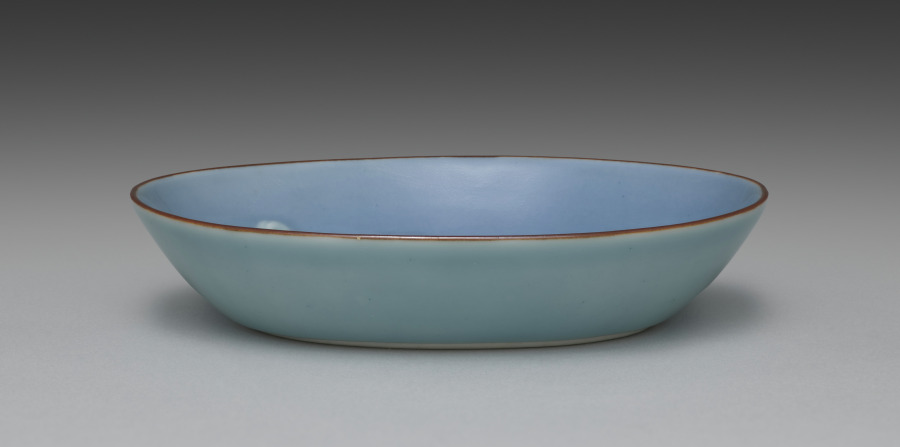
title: Dish from Dishes with Shells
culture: Japan, Taishō period (1912–26)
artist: Seifū Yohei IV (Japanese, 1872–1951)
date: 1914–46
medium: One from a set of five dishes; porcelain with blue glaze, iron oxide, and molded design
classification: Ceramic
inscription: 清風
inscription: 清風造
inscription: 清風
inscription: 成山清風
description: Yohei IV chose an aquatic theme for this set of five mukōzuke, side dishes. He added an iron oxide rim and used a concentrated blue glaze on both the interior and exterior. The glaze, named on the box lid, is his father’s “evening moon” (tsukiyoi) color. The conch in relief takes up the entire bottom of the dish. Up the sides are two snails on one end and on the other a scallop. This results in a boldly graphic, less realistic effect.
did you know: This set of dishes, mukōzuke, could be used for serving small side dishes at a tea gathering.